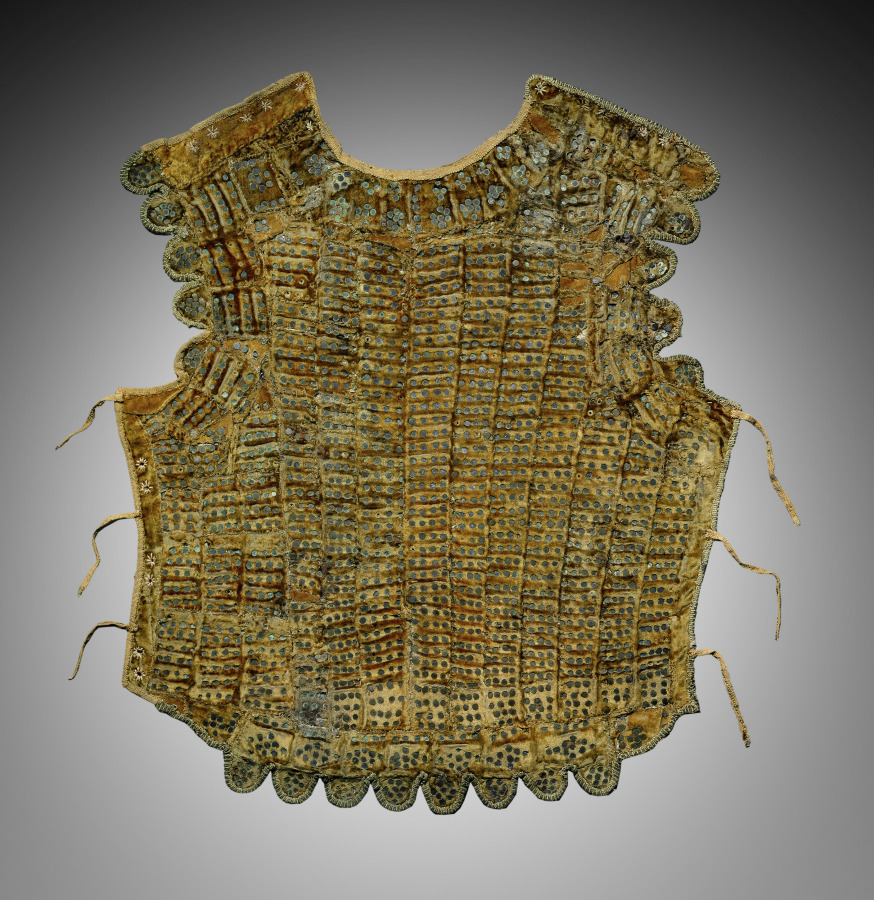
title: Body Guard (Brigandine)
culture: Italy (?), early 16th Century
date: c. 1500–1525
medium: linen; gold velvet; steel; brass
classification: Arms and Armor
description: The brigandine is a light, vest-like body defense popular with both knights and infantry from the 1400s through about 1550. It is constructed of multiple small plates attached to a cloth covering. Finer examples, like this one, are faced in velvet or fabric made of gold thread. The lightweight brigandine provided protection from the weather, and was extremely flexible.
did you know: This vest only weighs about five and a half pounds, considerably lighter than plate armor.